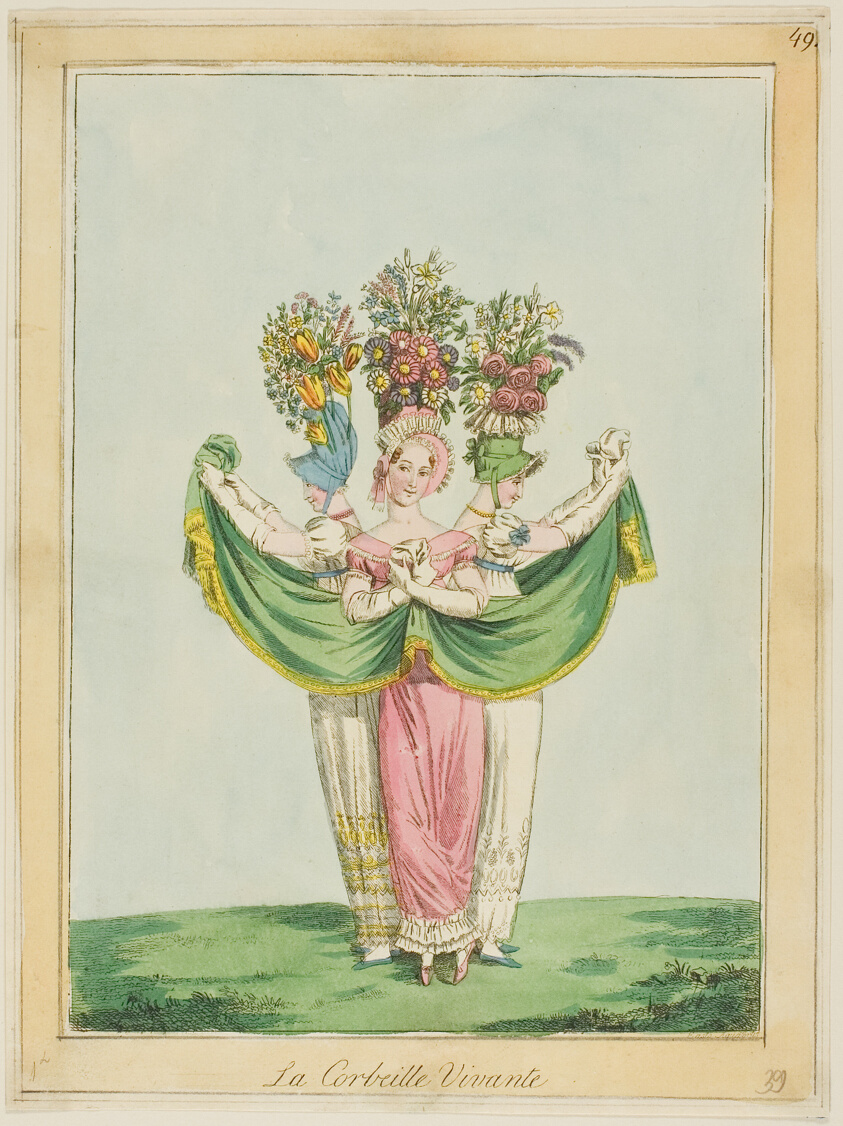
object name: Print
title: The Living Basket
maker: Unknown Artist; French, 19th century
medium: Hand-colored etching, with roulette, on cream wove paper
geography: France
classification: etching; print; prints and drawing